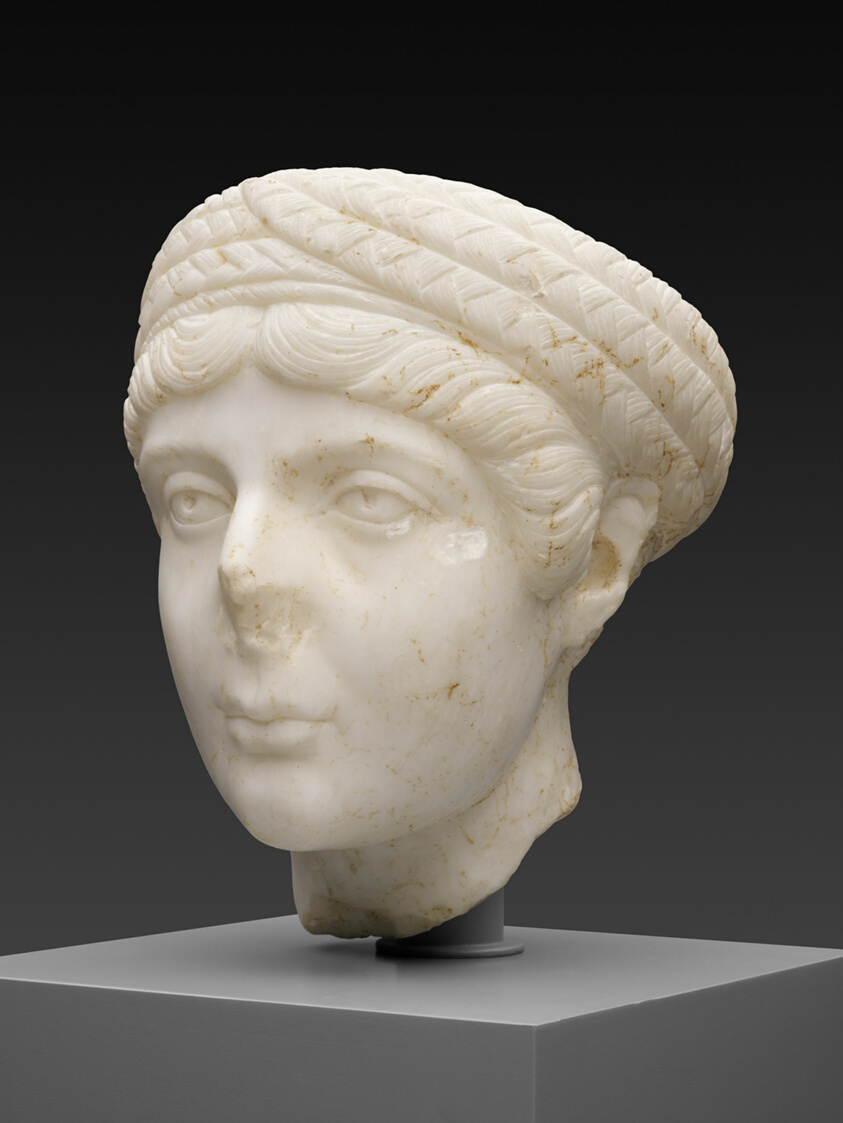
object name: Sculpture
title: Portrait Head of a Young Woman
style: imperial (roman), ancient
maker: Roman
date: 130-40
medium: Marble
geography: Roman Empire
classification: sculpture; marble; stone; ancient art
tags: portraits, hairstyles, woman